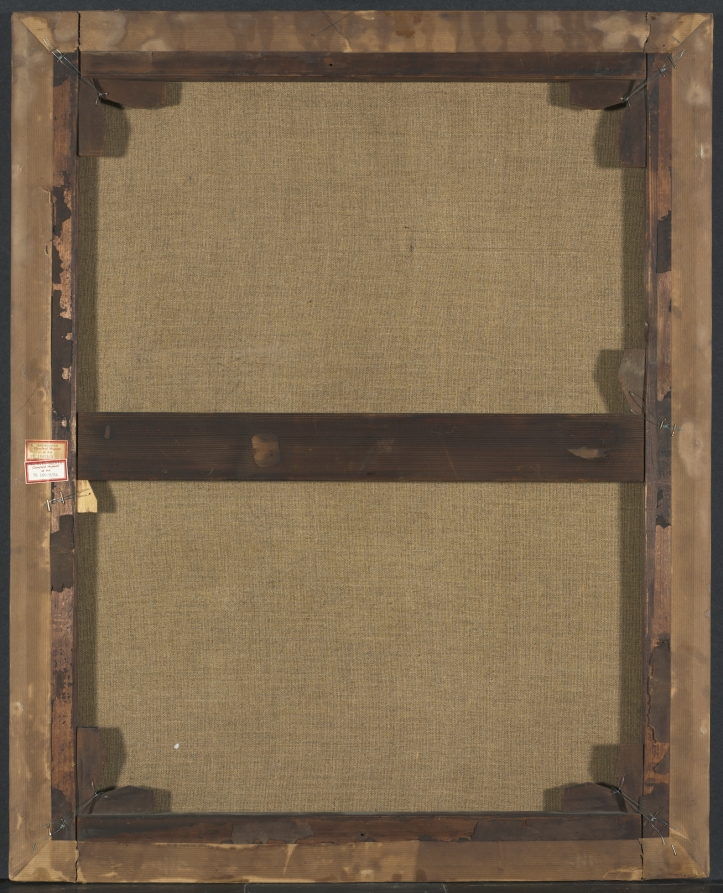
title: Portrait of a Man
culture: France, 19th century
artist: Gustave Caillebotte (French, 1848–1894)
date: 1880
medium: oil on canvas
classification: Painting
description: This portrait of Albert Courtier was painted in the fourth-floor apartment at 31 boulevard Hausmann in Paris that Gustave Caillebotte shared with his brother Martial. The interior and balcony of this apartment provided the setting for numerous paintings of men in Caillebotte’s social circle surveying the city. Courtier’s pose and unguarded gaze suggest a comfortable rapport with the artist. Their relationship was close: Courtier posed for Caillebotte on several occasions, owned four of the artist’s paintings, and designated his friend as godfather to his eldest daughter.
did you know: The subject of this portrait is Albert Courtier, Gustave Caillebotte's notary as well as a lifelong family friend.